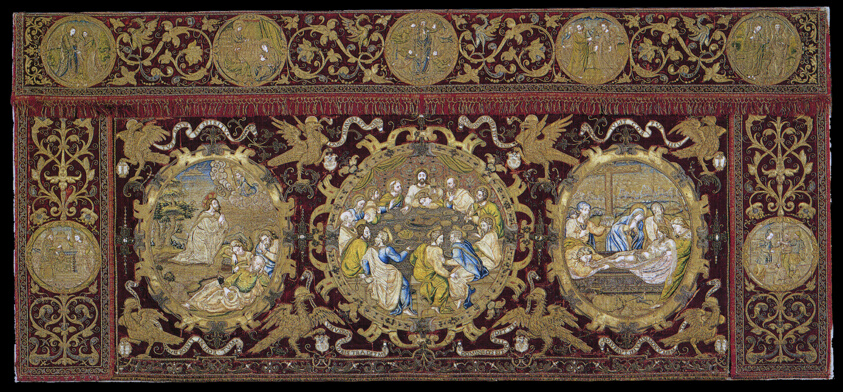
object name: Religious/Ritual Object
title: Altar Frontal Depicting Scenes from the Life of Christ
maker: Made for the Cathedral Seo de Urgel; Lèrida Provence, Spain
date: Late 16th century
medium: Silk, warp-float faced broken warp chevron twill weave with supplementary pile warps forming cut solid velvet; appliquéd with linen, plain weave, silk and gilt and silvered wire, plain weave with twill interlacing of secondary binding warps and patterning wefts; silk and silvered wire, twill weave; embroidered with silk, gilt- and silvered-metal-strip-wrapped silk and gilt and silvered wire in overcast, satin, padded satin, split, and stem stitches; laid work, couching, and padded couching; semi-precious stones; edged with woven fringes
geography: Seo de Urgel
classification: textile; needlework (visual works); liturgical; ritual objects